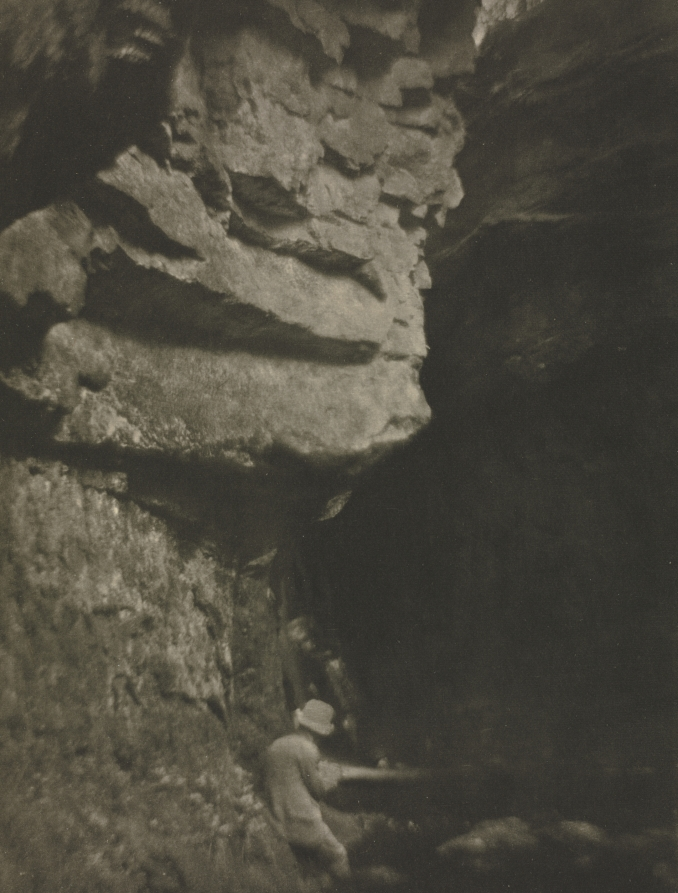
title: Camera Work: Man Sketching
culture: England, 20th century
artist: J. Craig Annan (British, 1864–1946)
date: 1910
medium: photogravure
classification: Bound Volume